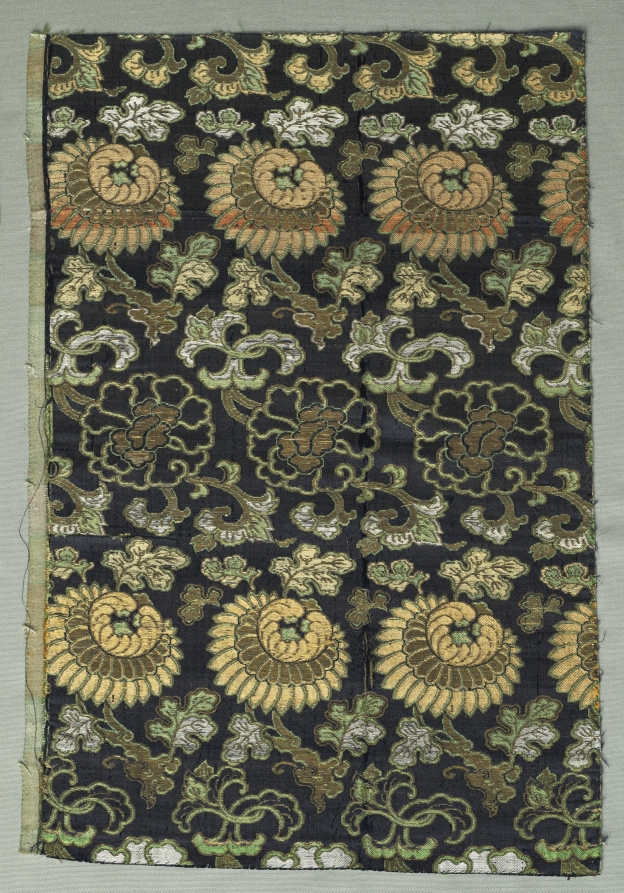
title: Fragment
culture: Japan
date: 1800s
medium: silk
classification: Textile